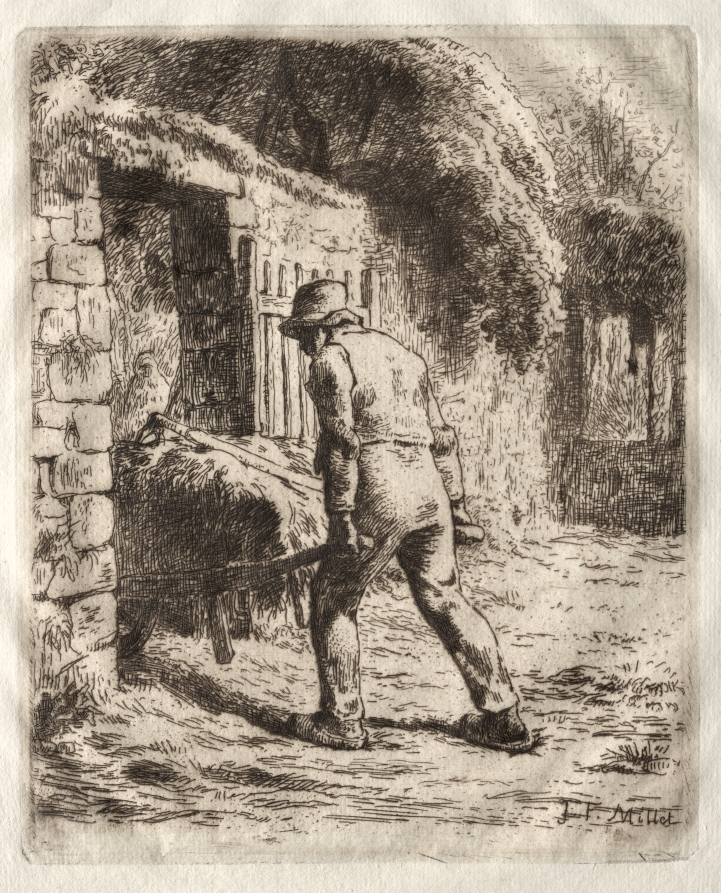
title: Peasant with a Wheelbarrow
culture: France, 19th century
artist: Jean-François Millet (French, 1814–1875)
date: 1855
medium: etching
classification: Print